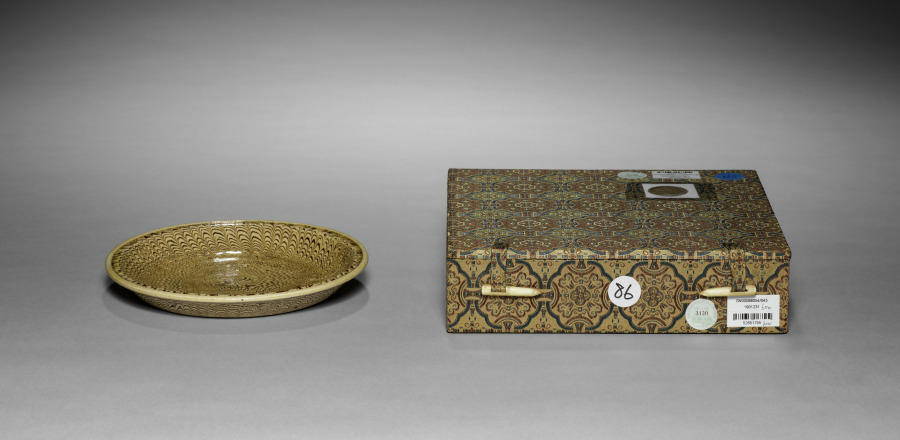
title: Flat Dish Made of Marbled Clay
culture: North or Central China, Northern Song (960–1127) or Jin dynasty (1115–1234)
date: 960–1234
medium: Stoneware with marbled clay and transparent glaze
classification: Ceramic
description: Using the marbling technique, in which light- and dark-colored clays are kneaded together (jiaotai; 絞胎), this dish is entirely covered with a transparent glaze, further enhancing the contrasting effect. The mixed clay technique had been used in northern China since the Tang dynasty (618–906), suggesting that potters may have attempted to imitate the effect of precious marbled glass from the ancient Near East that was traded via the Silk Road. The Keithleys acquired this dish to accompany the monumental ink drawing Poetic Pattern of Song Ware (CMA 2020.146) in their collection, that was inspired by such a ceramic.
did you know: This dish features lively contrasting black and beige clay marbling underneath a transparent glaze.